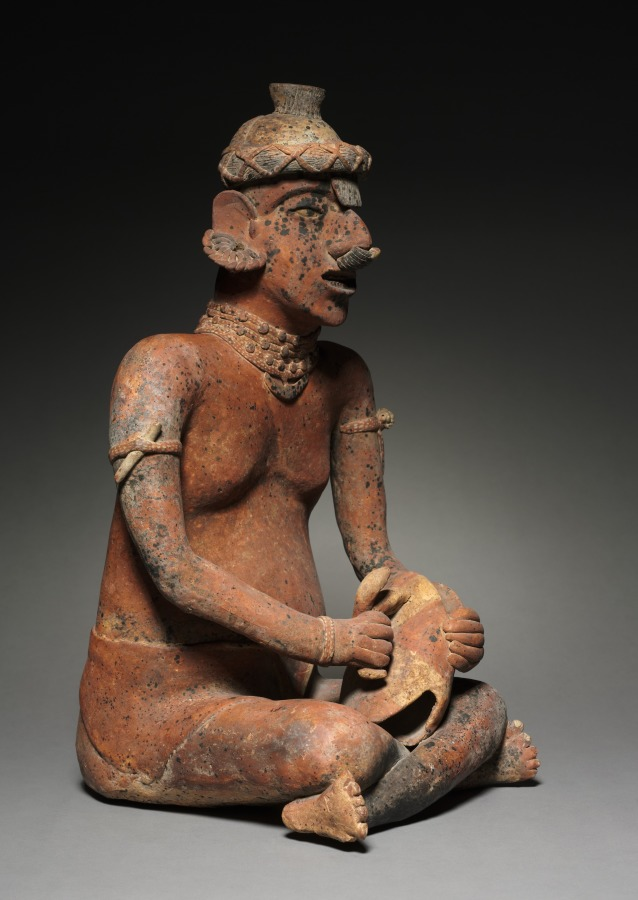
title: Male Seated Figure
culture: Mexico, Nayarit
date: 100 BCE–300 CE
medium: ceramic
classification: Ceramic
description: This couple-extremely fine examples of their kind-may commemorate the marriage of an important person, such as a chief, but could also represent siblings of a chiefly family. Whatever their relationship, their unity is conveyed by their physical similarities, including their jewelry, which marks high social station. The female is unusual in nursing an infant, likely a reference to generational renewal and the continuation of noble bloodlines. The significance of the male’s activity-beating a turtle-shell drum- is not understood.